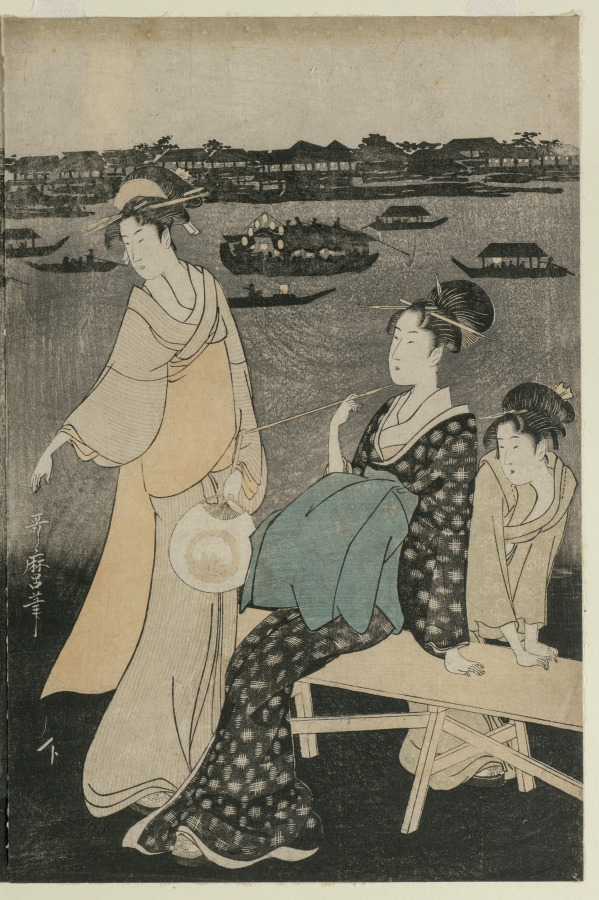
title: Women Enjoying the Evening Cool Near Ryogoku Bridge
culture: Japan, Edo period (1615–1868)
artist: Kitagawa Utamaro (Japanese, c. 1754–1806)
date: c. mid 1790s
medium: color woodblock print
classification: Print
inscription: Artist's signature: Utamaro hitsu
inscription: Publisher: Yamguachiya Chūsuke (emblem)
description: People crowding the Ryōgoku Bridge over the Sumida River and those aboard party boats below enjoy summer fireworks. Among a group gathered on the riverbank a little boy stands holding his caged pet cricket in one hand, and a young woman’s hand in the other. At left, a boy with a lantern advertising the name of the restaurant for which he works, “Ōnoshi,” guides two women away.